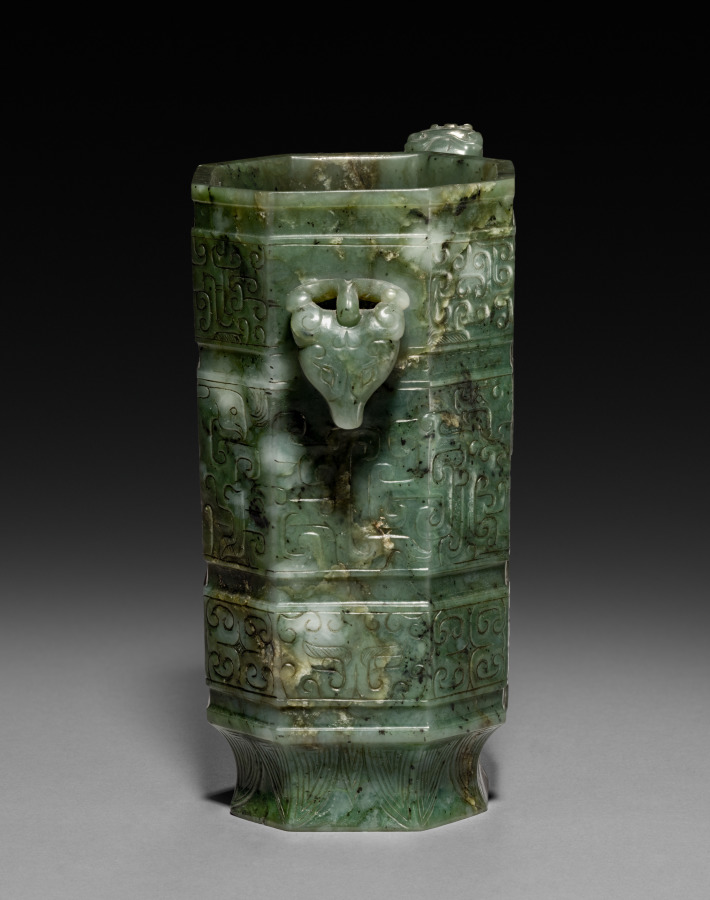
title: Octagonal Ewer with Dragon Handle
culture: China, Qing dynasty (1644–1911), Qianlong reign (1736–95)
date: 1736–95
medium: jade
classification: Jade